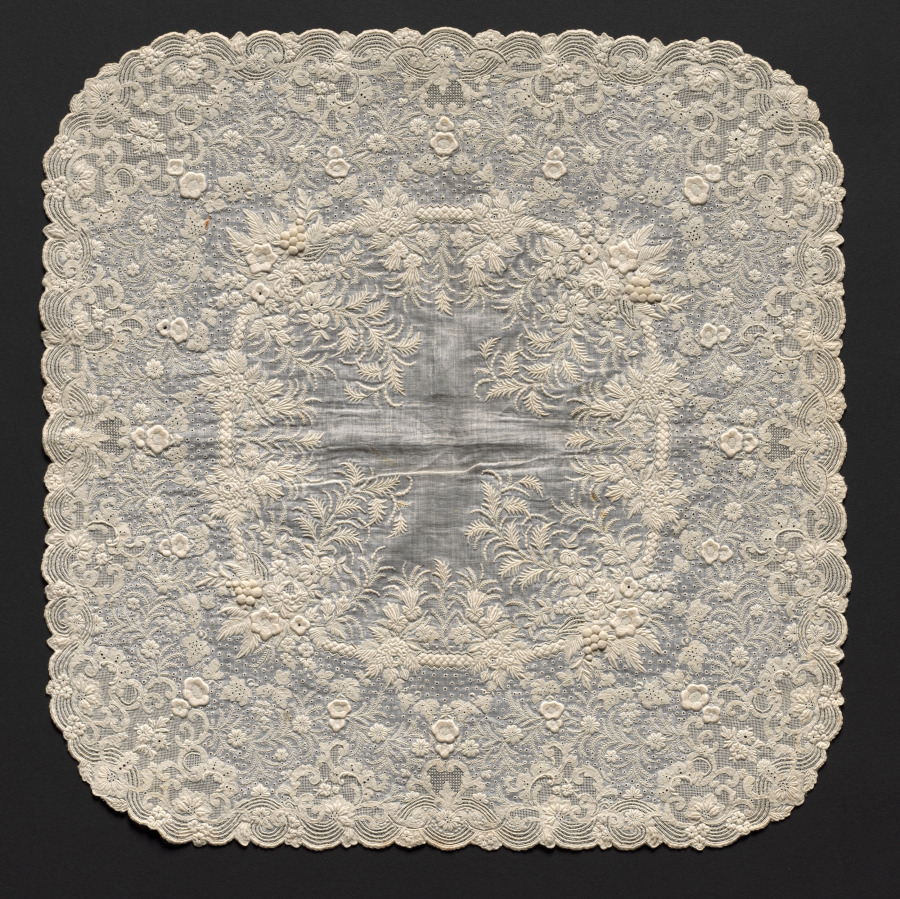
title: Lace Handkerchief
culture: Switzerland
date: 1800–1820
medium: Plain weave linen: needle lace (drawnwork) and embroidery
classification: Embroidery